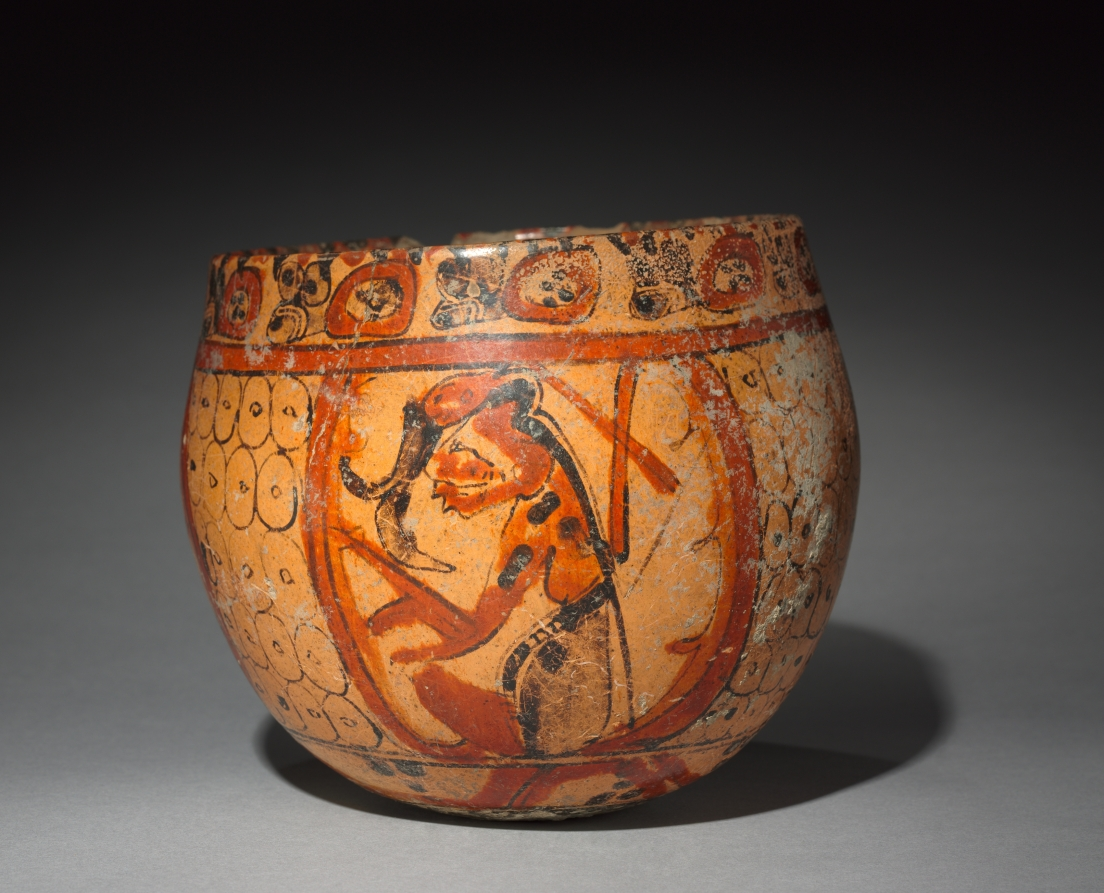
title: Bowl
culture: Mexico or Guatemala, Maya, Late Classic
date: 600–900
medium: pottery with burnished, colored slips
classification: Ceramic